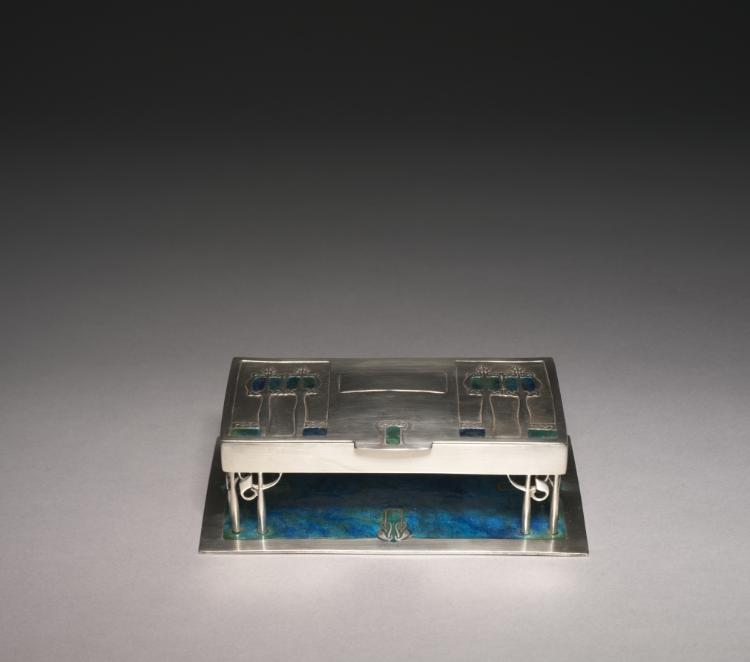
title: Box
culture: England, early 20th century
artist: attributed to Archibald Knox (British, 1864–1933)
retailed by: Liberty and Company (British)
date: c. 1901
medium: silver and enamel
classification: Silver